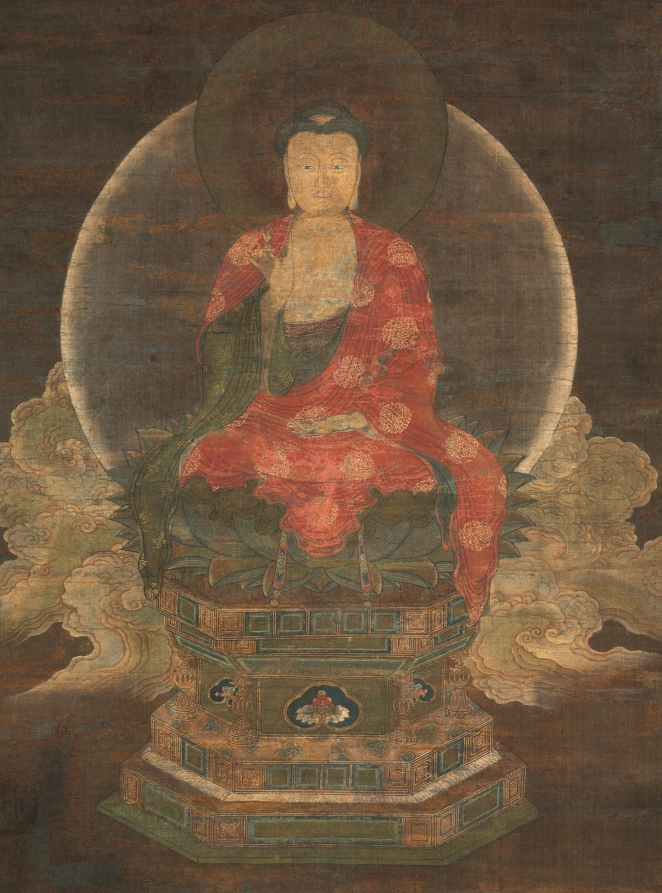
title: Shakyamuni Triad: Buddha Attended by Manjushri and Samantabhadra (Buddha)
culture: China, Fuzhou, Fujian Province, Yuan dynasty (1271-1368)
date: late 1300s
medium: Hanging scroll; ink and color on silk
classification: Painting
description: This triptych is a rare example of Yuan Buddhist painting. It depicts the historic Buddha Shakyamuni flanked by two attending bodhisattvas, Manjushri (the bodhisattva of wisdom, riding a lion) and Samantabhadra (the bodhisattva of universal virtue, riding an elephant). Below them are others seeking enlightenment: two disciples of the Buddha (Ananada and Kasyapa), two non-Chinese people, a boy with topknots, and a female worshiper. The clouds above and around the divine beings form one scene that illustrates Shakyamuni’s sermon from the Lotus Sutra. This text became an important basis for Buddhist faith throughout East Asia and was central to the Mahayana school of Buddhism.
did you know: Shakyamuni is seated cross-legged on the throne with the hand gesture (mudra) of giving instruction.